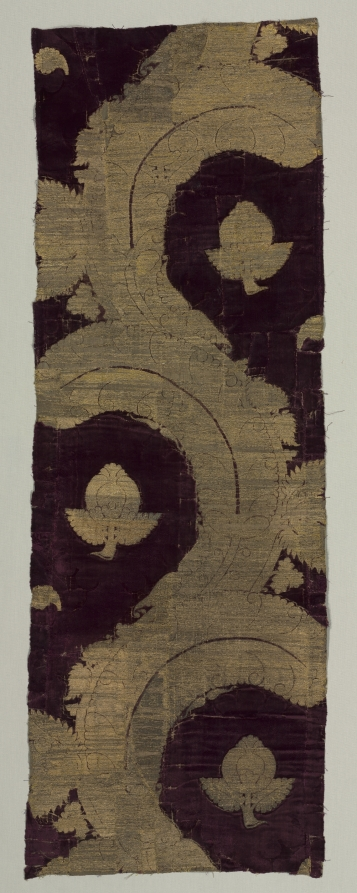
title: Velvet Fragment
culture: Italy, early 15th century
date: early 1400s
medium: velvet (cut, voided, and brocaded): silk and gold thread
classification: Velvet